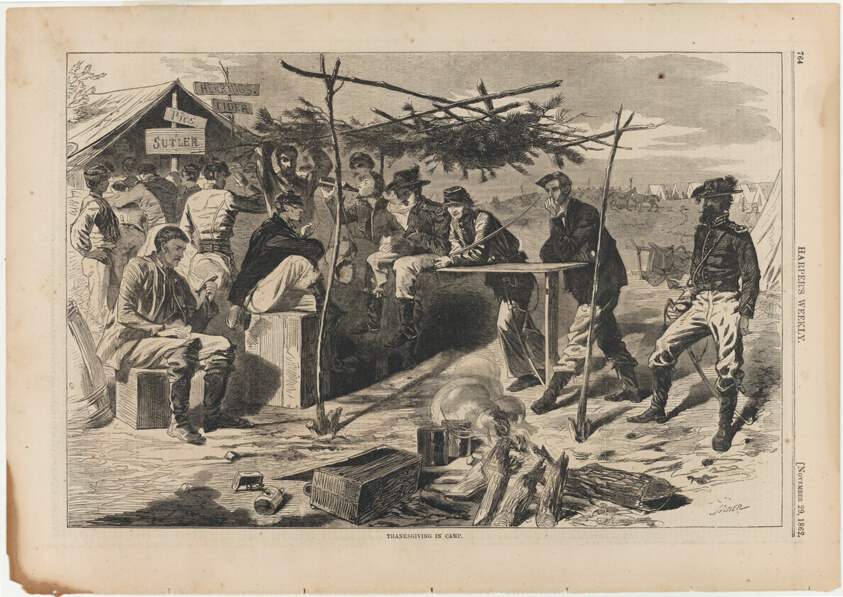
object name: Print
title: Thanksgiving in Camp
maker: Winslow Homer (American, 1836-1910); published by Harper's Weekly (American, 1857-1916)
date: published November 29, 1862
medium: Wood engraving on paper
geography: United States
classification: wood engraving; print; prints and drawing